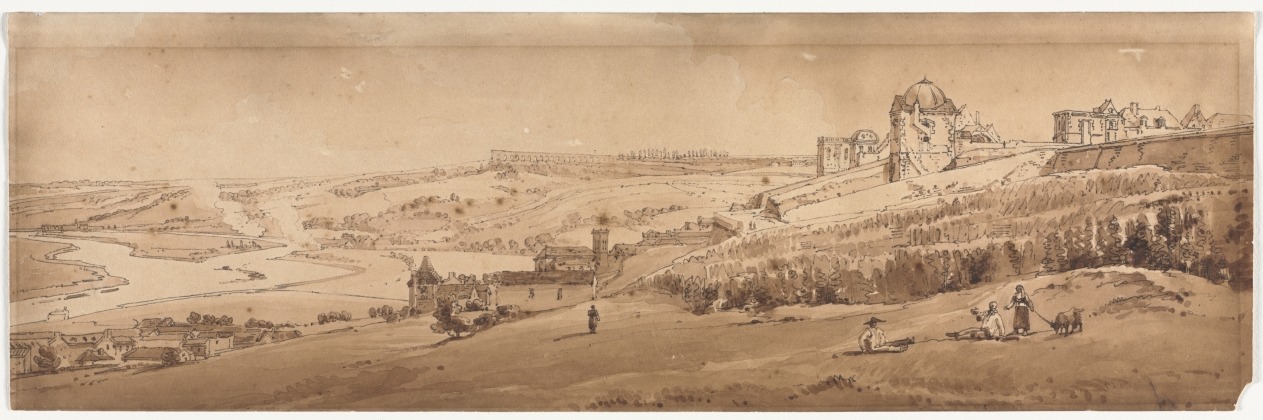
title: A Selection of Twenty of the Most Picturesque Views in Paris: View from Palace Terrace at St. Germain-en-Laye, the Aqueduct of Marli seen in the Distance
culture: England, early 19th Century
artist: Thomas Girtin (British, 1775–1802)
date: 1802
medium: soft-ground etching with bistre wash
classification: Print